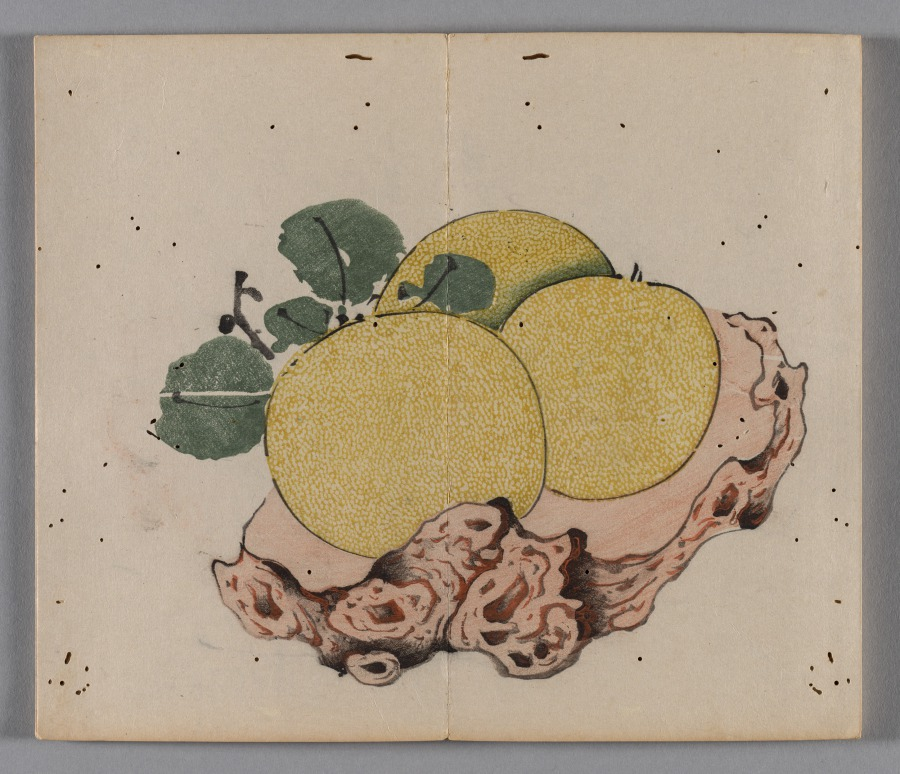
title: Ten Bamboo Studio Painting and Calligraphy Handbook (Shizhuzhai shuhua pu): Fruit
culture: China, Qing dynasty (1644-1911)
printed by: Hu Zhengyan (Chinese, c. 1584–1674)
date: 1633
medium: Woodblock-printed book; ink and colors on paper; first edition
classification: Print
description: Color printing reached a level of perfection in the early 1600s, as seen in this Ten Bamboo Studio Collection of Calligraphy and Painting and the Mustard Seed Garden Manual of Painting (printed 1679 and 1701). The painterly quality, precision in registering (aligning) the woodblocks, and harmonious colors made them the most successful color print editions in Chinese history. Both editions were printed and compiled in Nanjing, spread nationwide, and had a great impact on the arts in Japan and Korea.